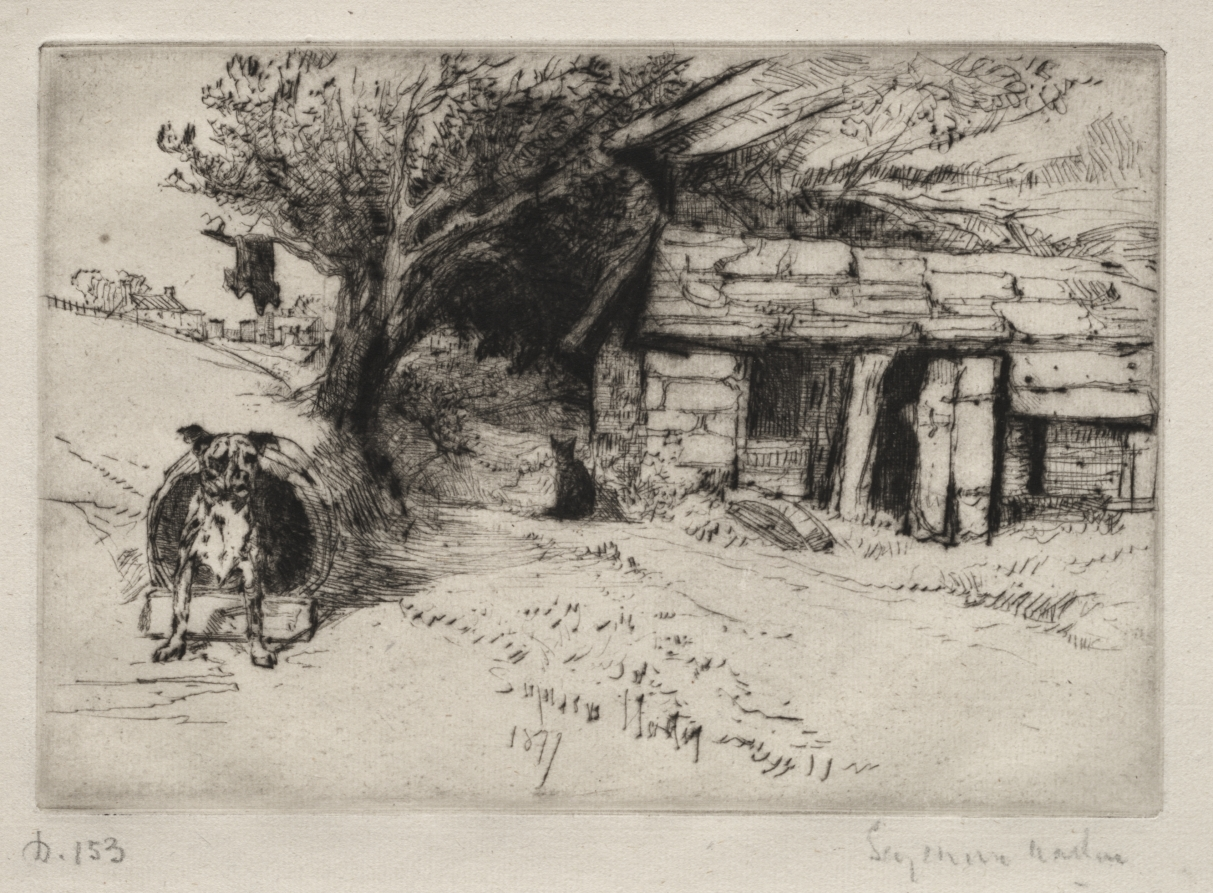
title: The Cabin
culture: England, 19th century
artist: Francis Seymour Haden (British, 1818–1910)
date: 1877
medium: drypoint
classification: Print